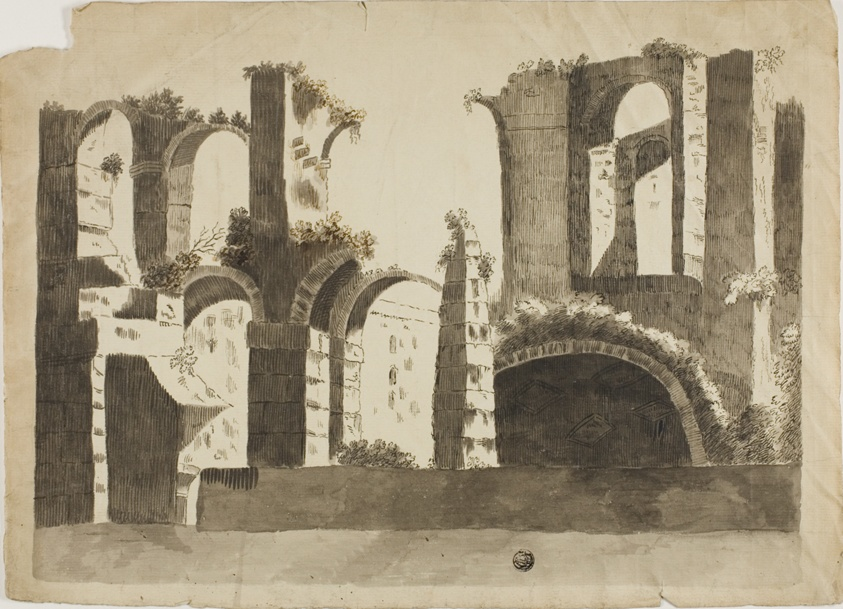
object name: Drawing and Watercolor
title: Roman Ruins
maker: Unknown Artist; European, 1700-1799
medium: Pen and black ink, and brush and gray wash, with touches of pen and brown ink, on cream laid paper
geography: England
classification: pen and ink drawings; drawings (visual works); prints and drawing